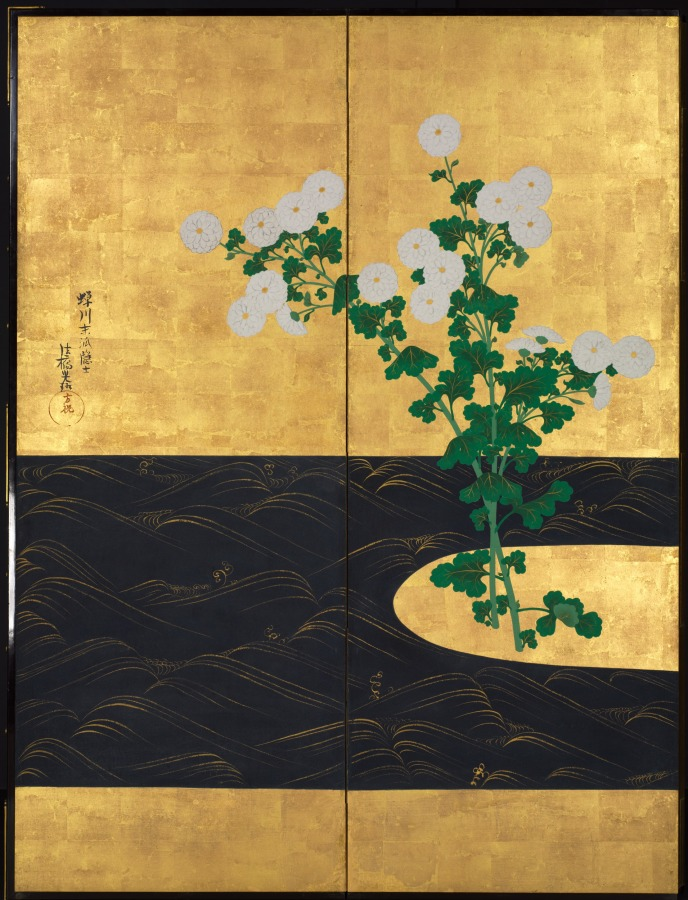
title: Chrysanthemums by a Stream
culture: Japan, Edo period (1615–1868)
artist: possibly by Ogata Kōrin (Japanese, 1658–1716)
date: c. 1715–30 or after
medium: One of a pair of six-panel folding screens; ink and color on gilded paper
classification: Painting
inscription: the signature and seal of Korin, "sensen mappa (makko) inshi hokyo Korin" (late generation hermit of the Kamo stream tradition) is written in two lines. A circular seal which reads "Hoshuku" is at the end of the second line on the edge of the first panel from the right.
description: These screens recall a painting style so closely identified with Ogata Kōrin (1658–1716) that it is called Rinpa, or “Rin School,” after the ideograph “rin” in his name. The highly stylized background accentuates floral groupings that have been groomed so as to appear utterly artificial, like the synthetic arrangements available today. Kōrin's genius derived in large measure from natural phenomena painstakingly observed and then manipulated to create compositions of startling refinement and sparkling isolation. This process may have grown out of Kōrin's early immersion in the family textile business, a medium that encourages such dramatic distillations of form: the stream's gold-crested waves bring to mind traditional kimono robe designs of Kōrin's era. Works with the signature seen on this painting, including a style name, or persona suggested to Kōrin by his brother Kenzan (1663–1743), are sometimes considered to have been produced either in the last year of his life, when he was very ill, or after his death. In both scenarios, the lion’s share of the work would have been done by studio assistants, but little is truly known of his studio practice. Given the regularity of the gold waves on the stream, and the tension in the arrangement of the chrysanthemums, it is also possible that the screens were made in emulation of Kōrin's designs by a later artist.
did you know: The signature used on these screens may indicate paintings made in the last year of the artist's life, or works completed by his studio after his death.